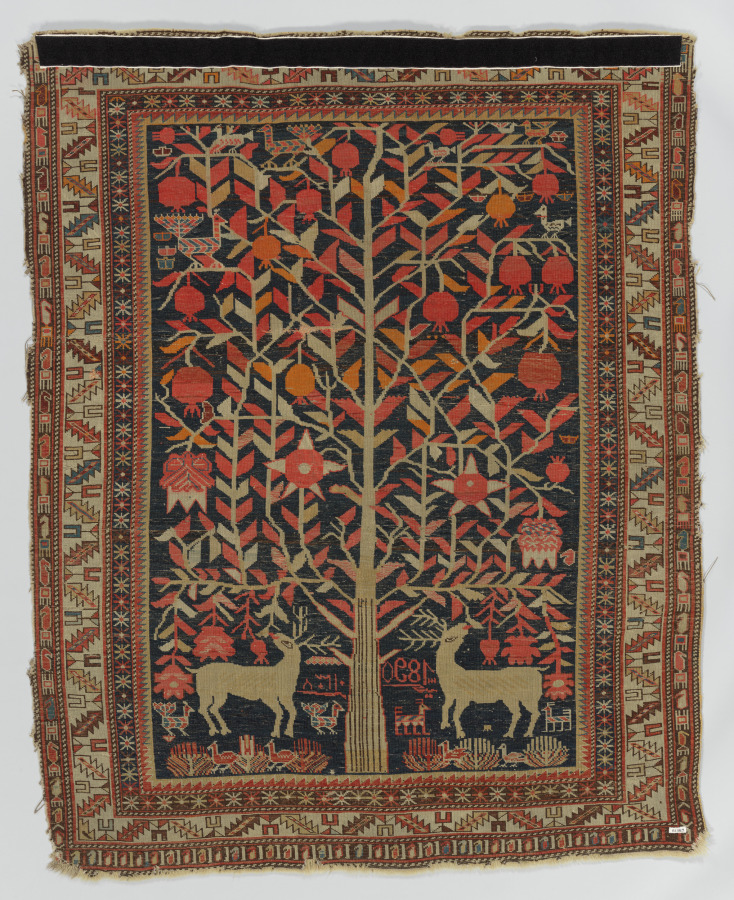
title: Carpet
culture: Azerbaijan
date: 1890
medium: Ghiordez knot: wool and cotton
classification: Carpet